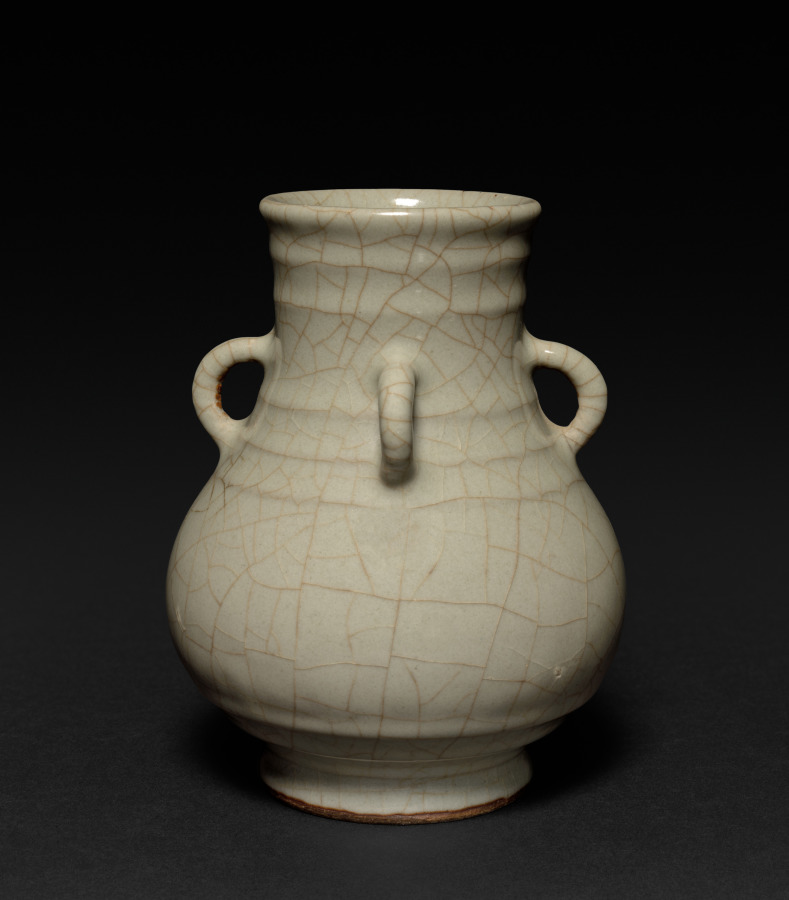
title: Vase: Guan type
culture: China, Qing dynasty (1644-1911)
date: 1700s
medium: porcelain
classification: Ceramic